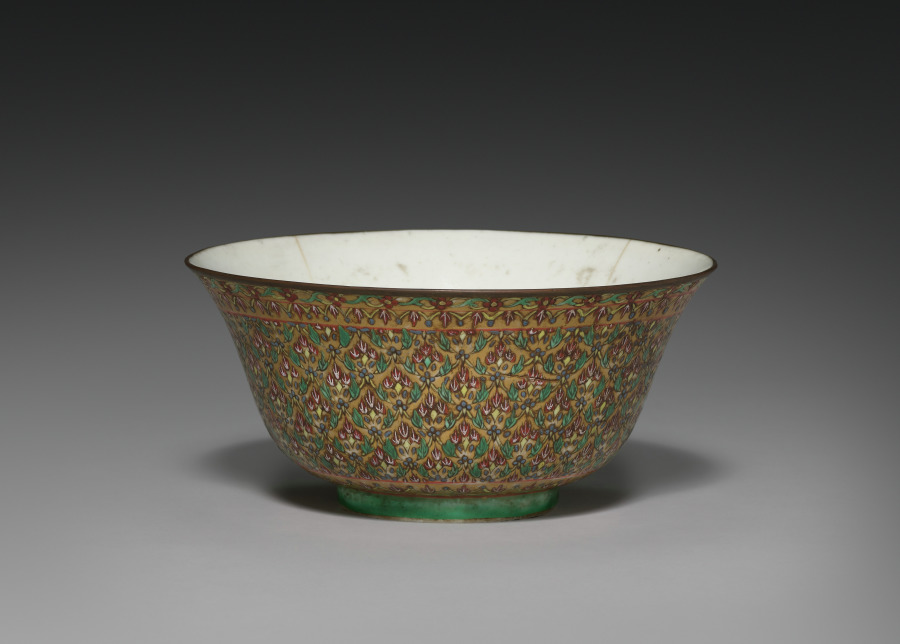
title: Chow Bowl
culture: Siam, 18th century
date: 1700s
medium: porcelain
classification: Metalwork